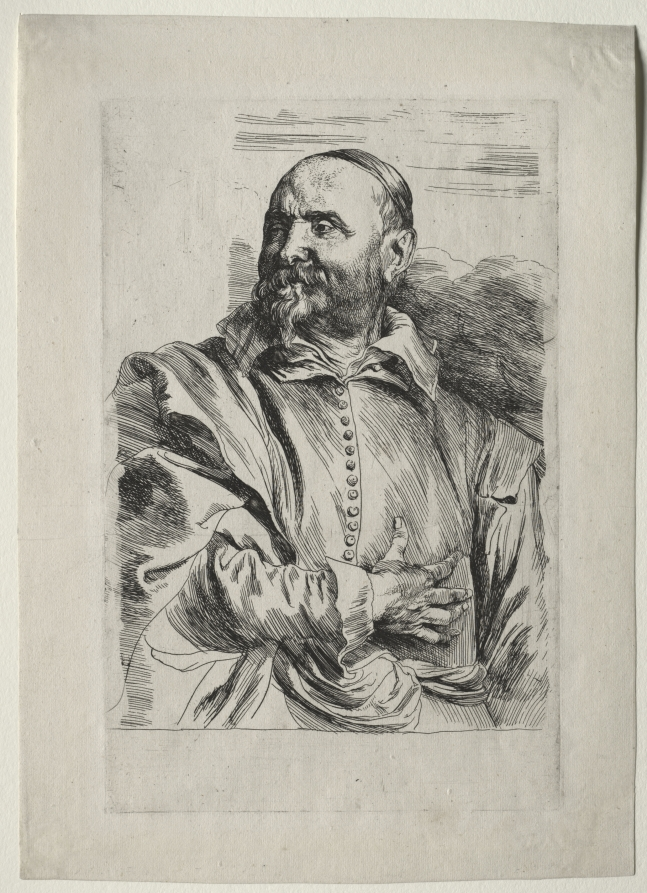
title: Jan Snellinx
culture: Flanders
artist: Anthony van Dyck (Flemish, 1599–1641)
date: 1630–33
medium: etching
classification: Print